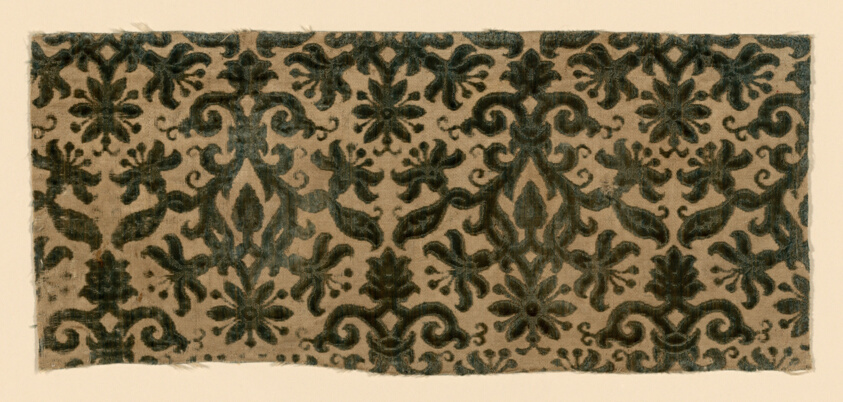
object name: Textile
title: Fragment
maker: Italy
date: c. 1600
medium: Silk, cut, uncut, and voided velvet against satin weave foundation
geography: Italy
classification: textile; weaving - velvet; weaving